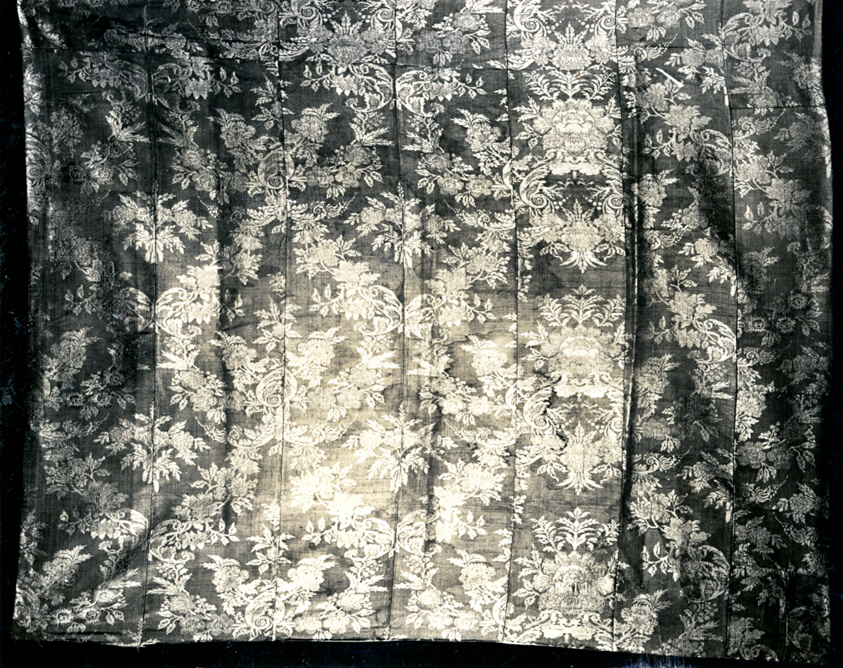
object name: Textile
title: Panel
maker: France (provincial) or Italy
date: c. 1733/40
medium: Silk, plain weave with supplementary patterning and brocading wefts bound in 3:1 twill interlacings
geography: France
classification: textile; weaving